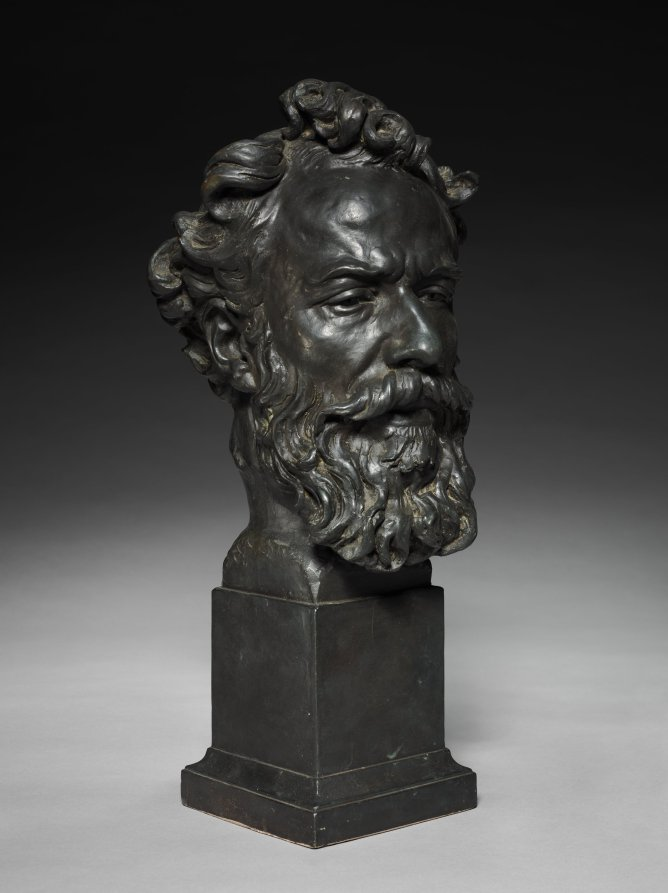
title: Head of Alphonse Legros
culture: France, 19th century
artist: Jules Dalou (French, 1838–1902)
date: c. 1876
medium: bronze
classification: Sculpture